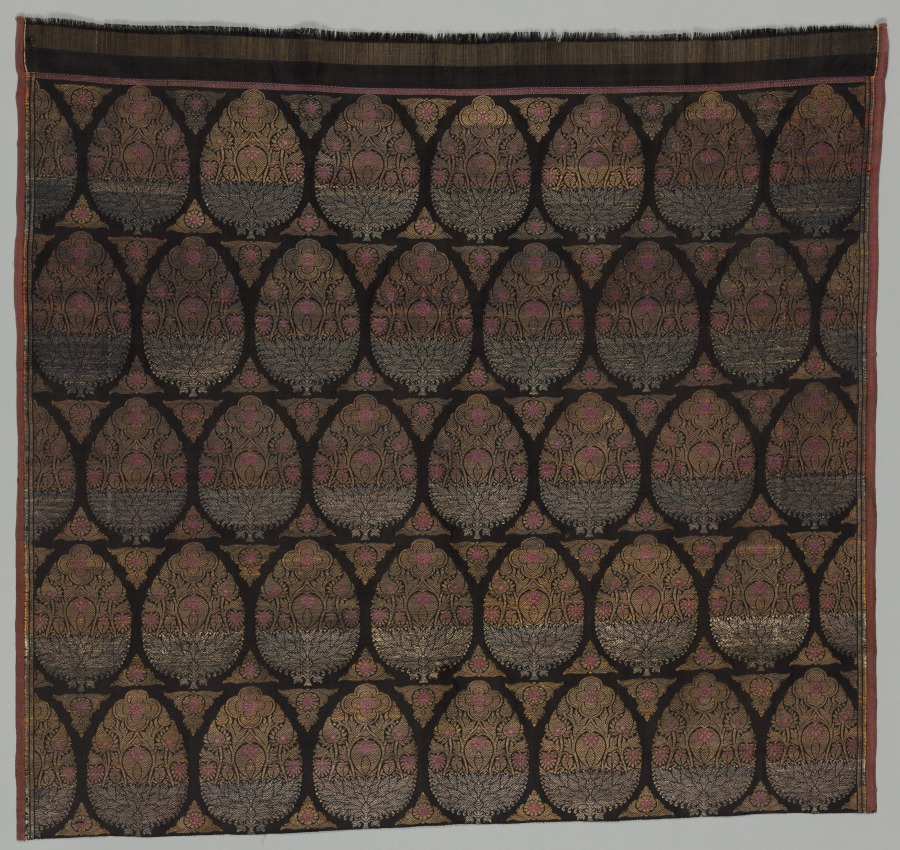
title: Fragment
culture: India, Benares, 19th century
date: 1800s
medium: brocade, "kimkhwab"; silk with gold and silver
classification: Textile